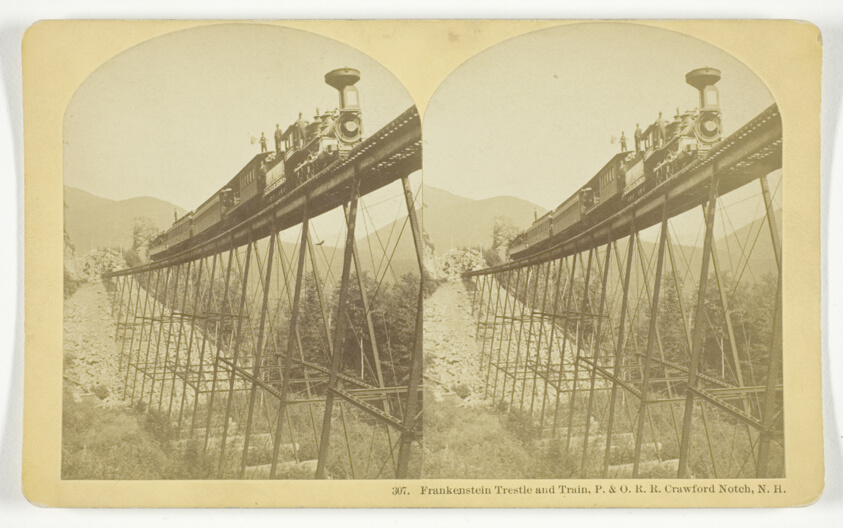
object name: Photograph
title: Frankenstein Trestle and Train, P. & O. R.R. Crawford Notch, N.H.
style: 19th century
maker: B. W. Kilburn; American, 1827–1909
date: Late 19th century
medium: Albumen print, stereo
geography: New Hampshire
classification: photography; photograph; albumen silver print; stereograph (albumen)